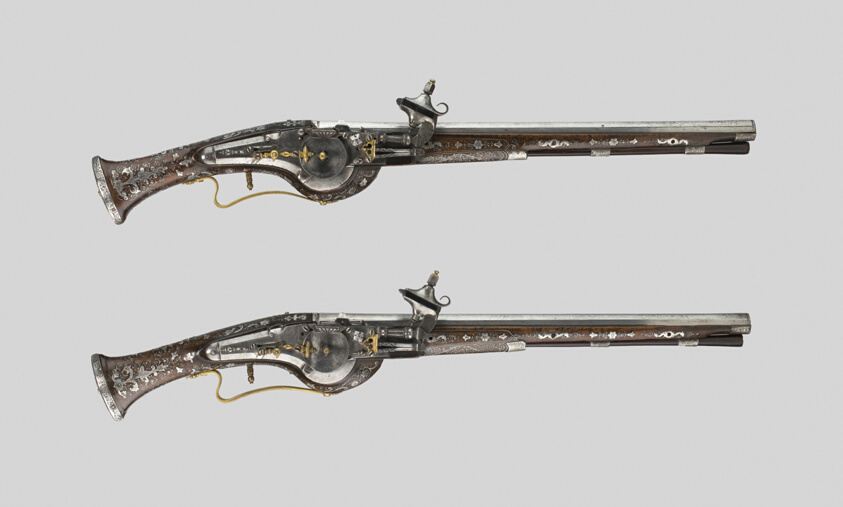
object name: Arms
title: Pair of Wheellock Pistols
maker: German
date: 1620/30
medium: Walnut, gilt brass, and silver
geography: Rhineland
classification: firearm-handgun; arms; arms and armor